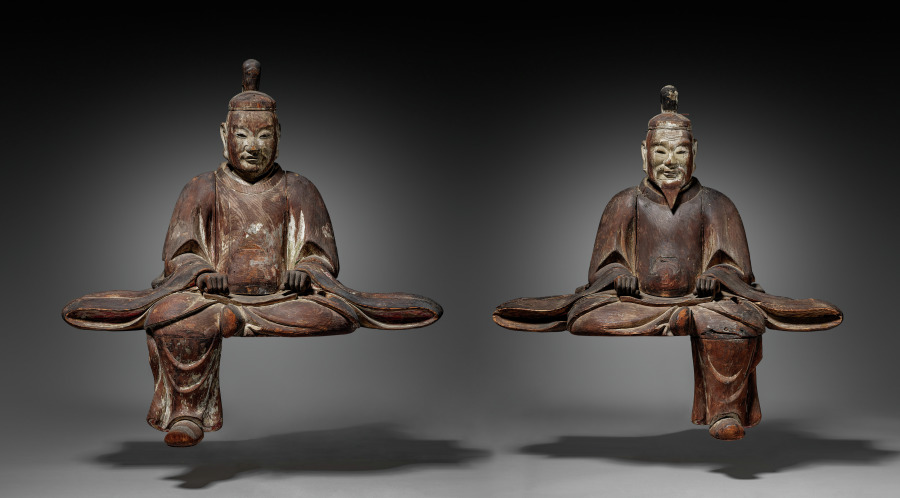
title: Pair of Guardian Figures (Zuishin)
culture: Japan, Muromachi period (1392–1573) to Edo period (1615–1858)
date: c. 1560–1625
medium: Japanese cypress (hinoki) with traces of color; crystal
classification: Sculpture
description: Sculptors carved these two figures to look like members of the guard who protected the Japanese aristocracy in the 10th to 12th centuries. The pair belong in the roofed gate of a Shinto shrine. Their role was to embody the divine protectors of the deities, or kami, residing at the shrine. Their inset crystal eyes make them appear vigilant.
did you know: Some Japanese sculptors used to specialize in inset crystal eyes like the ones these sculptures have.